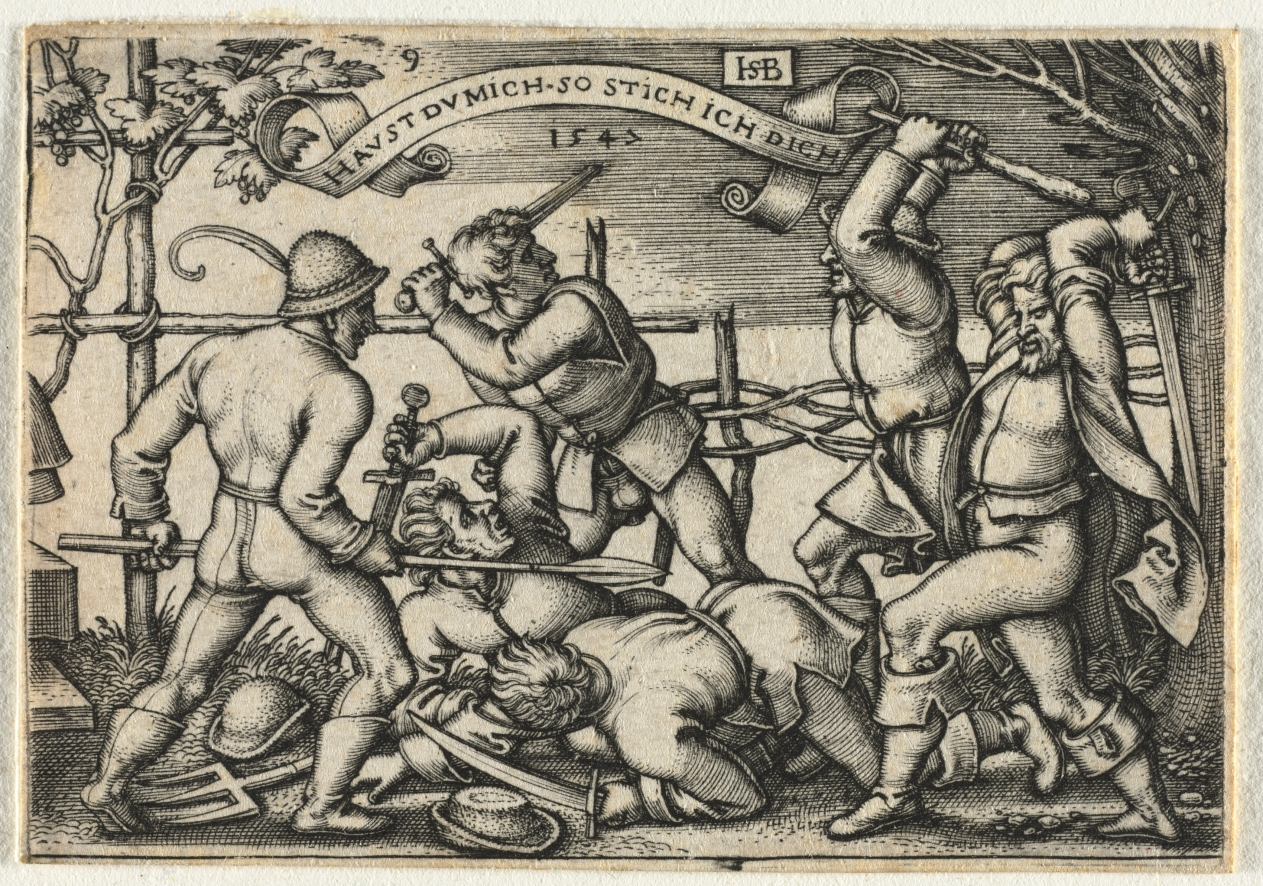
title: The Peasant Wedding or the Twelve Months: No. 9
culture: Germany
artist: Hans Sebald Beham (German, 1500–1550)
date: 1547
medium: engraving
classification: Print